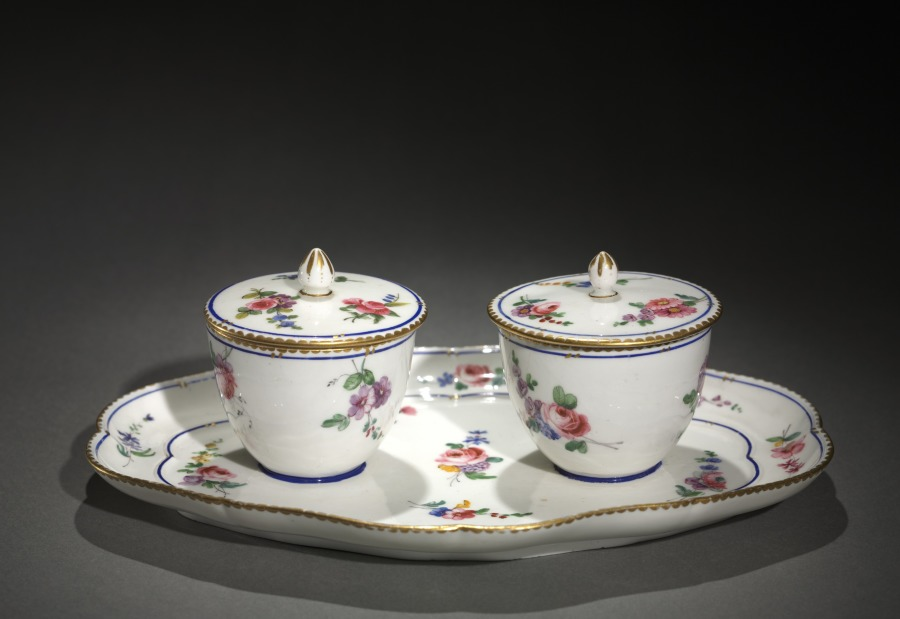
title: Jam Pots on Stand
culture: France, 18th century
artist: Sèvres Porcelain Factory (French, est. 1756)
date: c. 1760's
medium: porcelain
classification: Ceramic